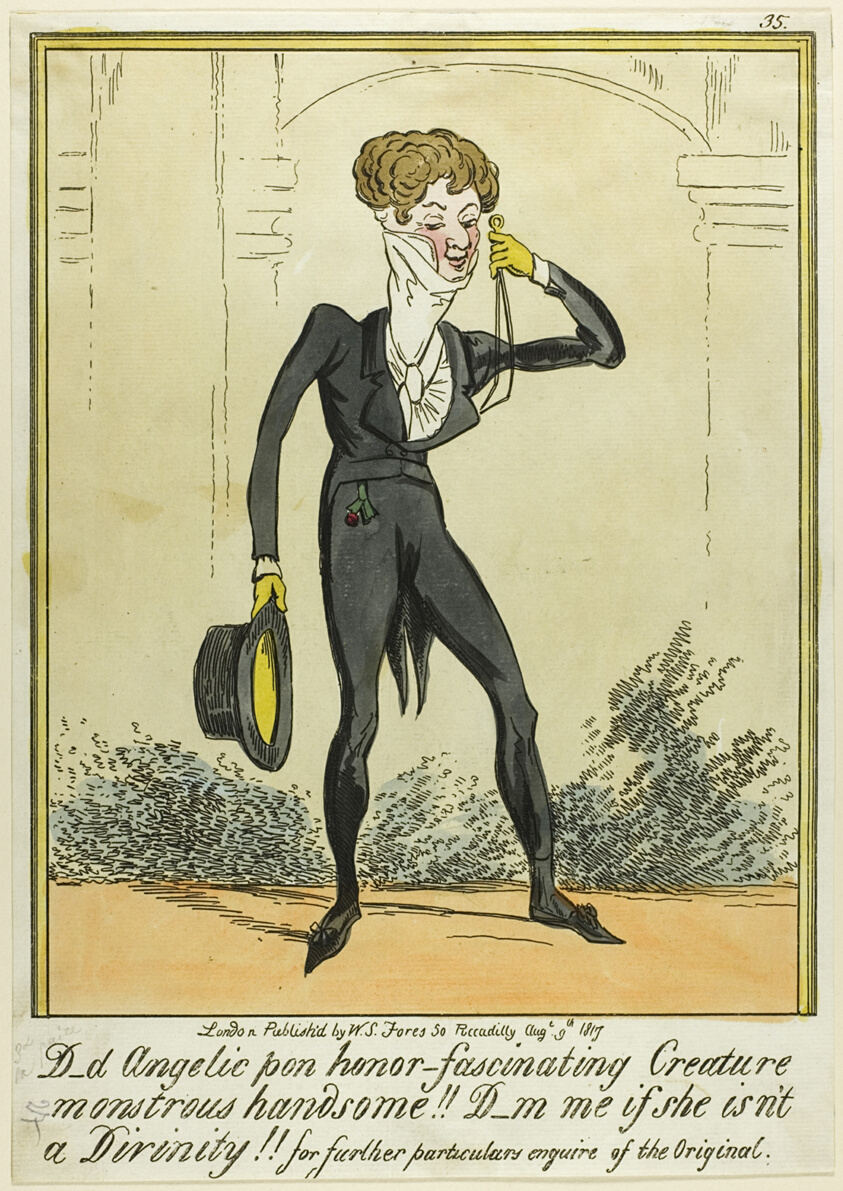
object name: Print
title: D_d Angelic pon honor-Fascinating Creature Monstrous Handsome!!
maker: George Cruikshank (English, 1792-1878); published by S.W. Fores (English, 1761-1838)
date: published August 9, 1817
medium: Hand-colored etching on ivory laid paper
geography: England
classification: etching; print; prints and drawing